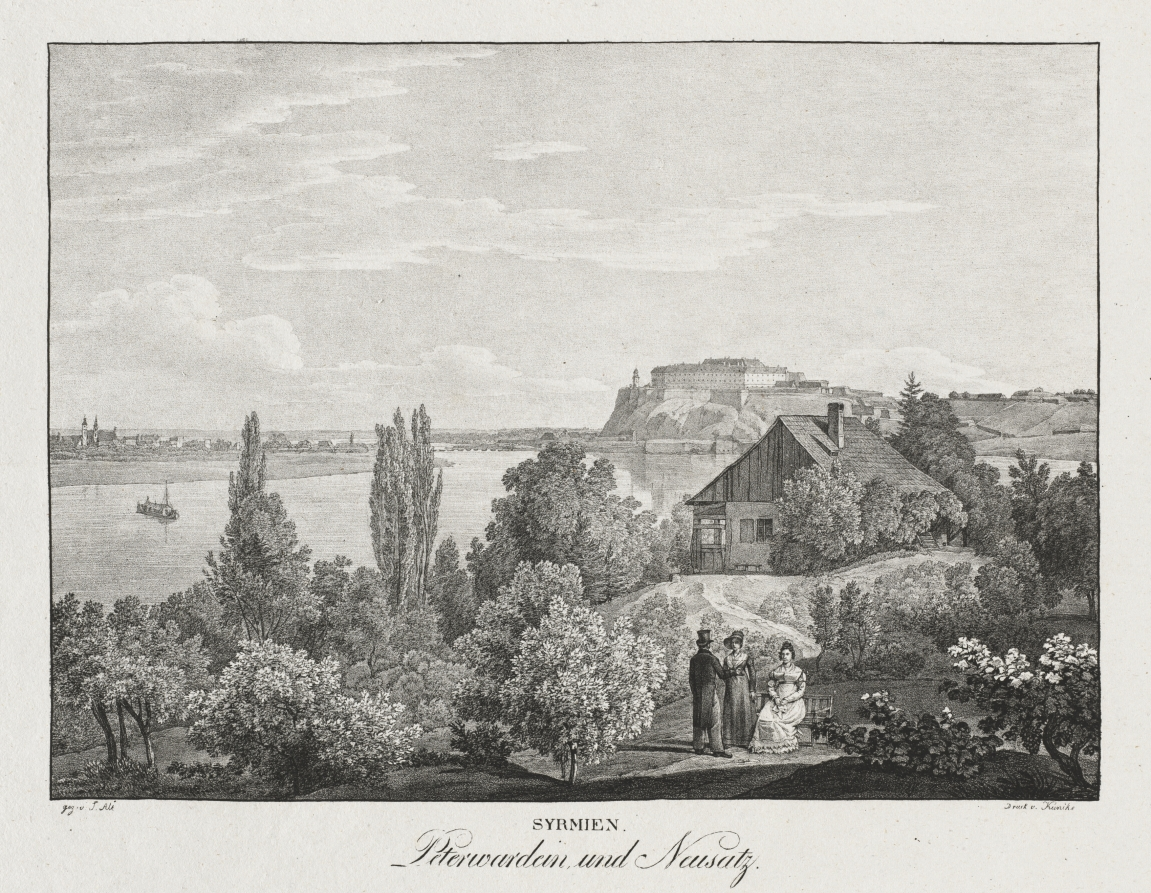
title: Syrmien, Peterwardein und Neusatz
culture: Austria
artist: Jakob Alt (Austrian, 1789–1872)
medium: lithograph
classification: Print